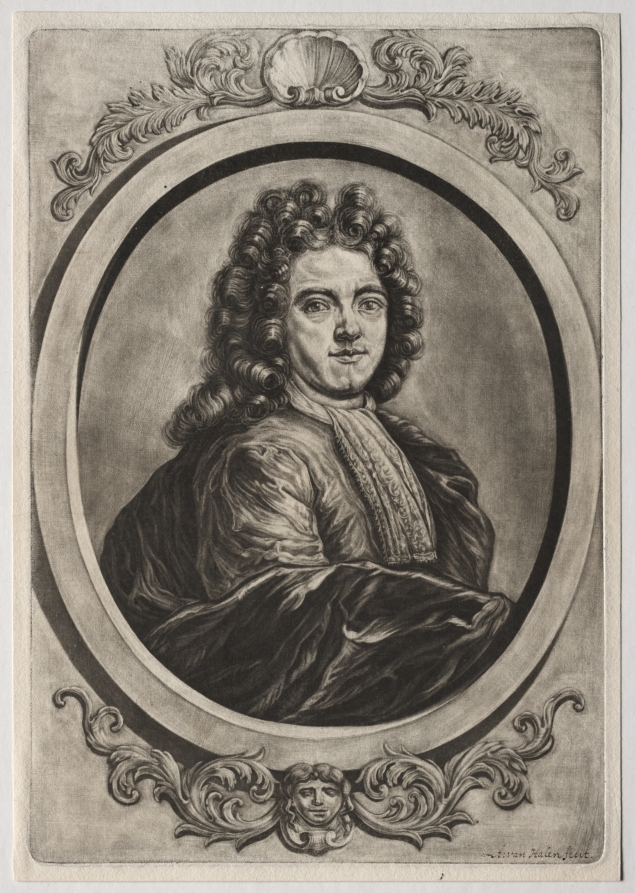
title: Self-Portrait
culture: Netherlands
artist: Arnoud van Halen (Dutch, 1673–1732)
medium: mezzotint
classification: Print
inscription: Lower right, in brown ink: A: van Halen Fecit.; verso, in pen and ink: J Gurix shen?